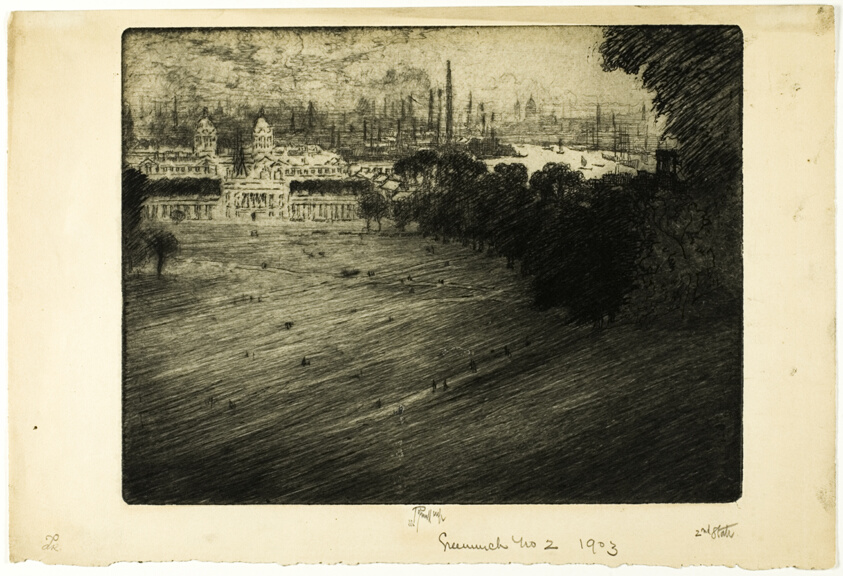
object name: Print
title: Greenwich Park, No. 2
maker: Joseph Pennell (American, 1857-1926)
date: 1906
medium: Etching and drypoint on cream wove paper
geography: United States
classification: etching; print; prints and drawing